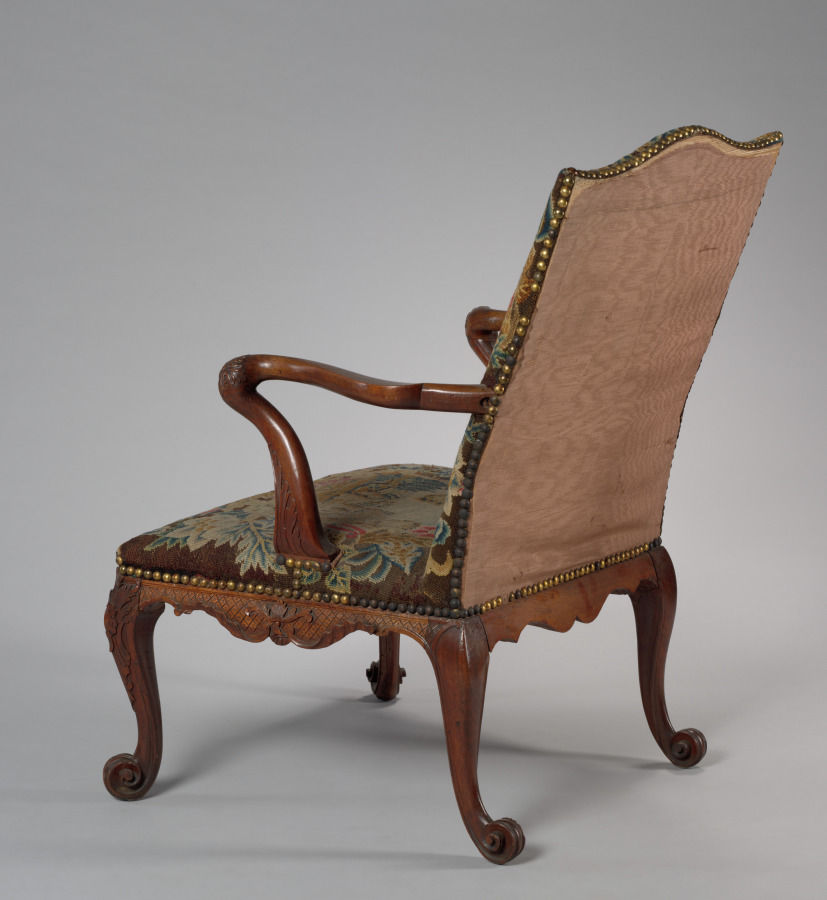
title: Armchair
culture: England, 18th century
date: 1760–1765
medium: mahogany upholstered in needlework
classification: Furniture and woodwork